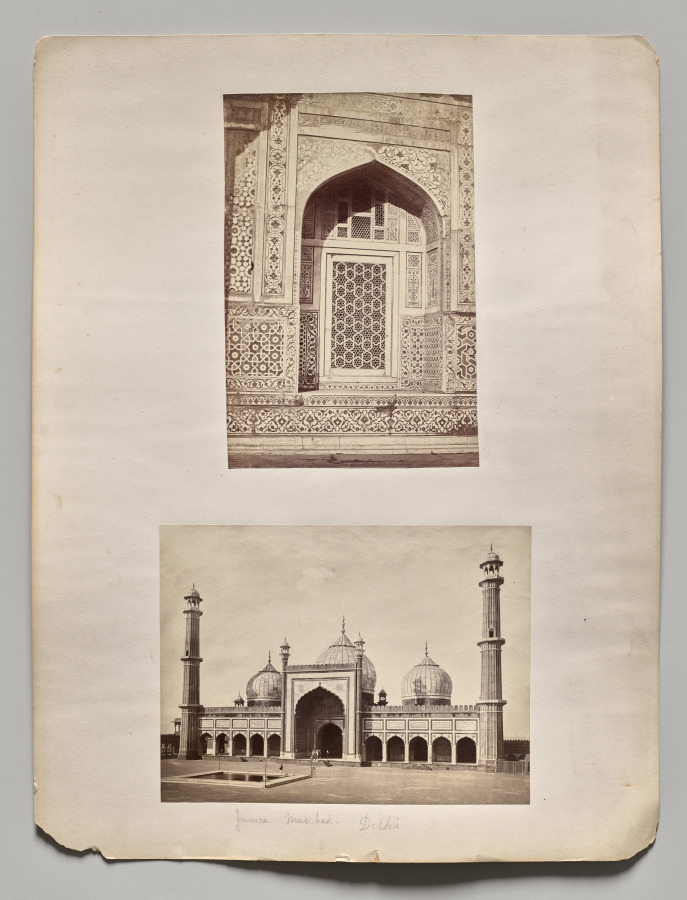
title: Untitled (Jama Masjid, Delhi)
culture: England, 19th century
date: 1870s (?)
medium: 2 albumen prints mounted on an album page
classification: Photograph